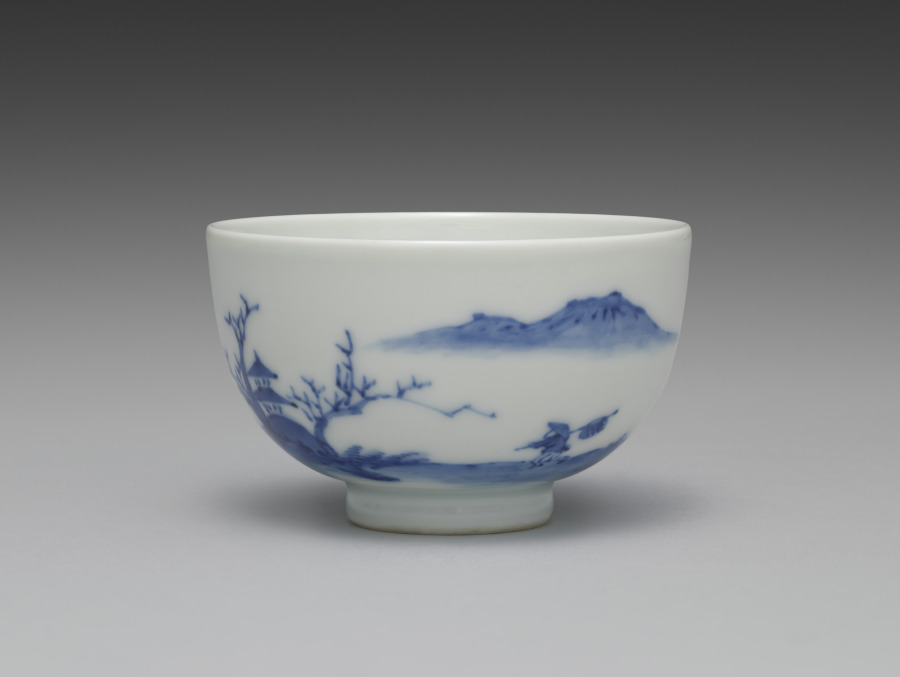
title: Teacup from Tea Set with Chinese Landscape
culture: Japan, Meiji period (1868–1912)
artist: Seifū Yohei III (Japanese, 1851–1914)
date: c. 1893–1914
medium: Porcelain with underglaze blue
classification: Ceramic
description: The theme of this sencha tea set is the Chinese scholar-recluse in an idyllic landscape. Each of the five teacups has a landscape with an architectural structure and some human activity. This tea set has a side-handled pot called a kyūsu, used for steeping, straining, and serving tea. Unlike some others, this set also has a yuzamashi, a container used to cool boiled water to just the right temperature for the best flavor when steeping. Seifū Yohei III’s painting teacher, Tanomura Chokunyū (1814–1907), made a visual record of famous sencha events that shows how these kinds of porcelains fit with objects such as a stove and kettle to form a complete set of utensils for tea preparation, and with ensembles of decorative objects meant to inspire creativity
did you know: A fourth cup shows a humbly dressed man with a broad-brimmed hat lugging a package tied to the end of a rod slung over his shoulder. In front of him is a two-story building flanked by deciduous trees and a man resting against the side of a sturdy stone bridge as he looks at a residence, or perhaps a set of roofed gates, further up the path.